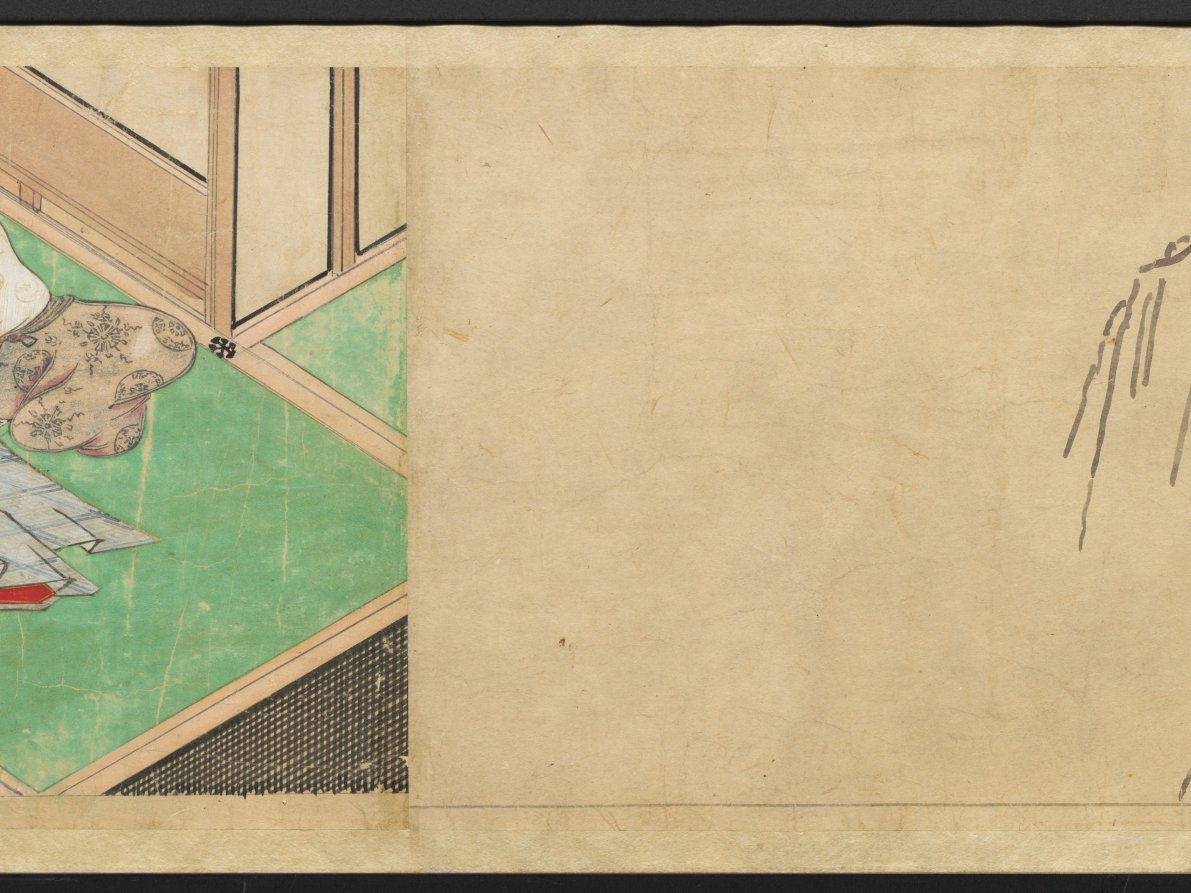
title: The Saltmaker's Story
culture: Japan, Edo period (1615–1868)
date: early 1600s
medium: One of a pair of handscrolls; ink, color, and gold on paper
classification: Painting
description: Once read and copied by girls at New Year’s celebrations and included in dowries, The Saltmaker’s Story is a rags-to-riches tale in which daughters are gifts from the gods. Despite his simple outlook, the main character progresses from humble roots as an associate at Kashima Shrine to the elite status of grandfather of the emperor through the intervention of the Kashima deity. The Saltmaker’s Story is traditionally presented in a set of three scrolls, but the text of this set has been removed by a previous owner, who remounted the illustrations as a pair. The paintings of this one take us from right to left through the first half of the tale.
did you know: This handscroll originally had texts before its paintings, but the texts were removed.